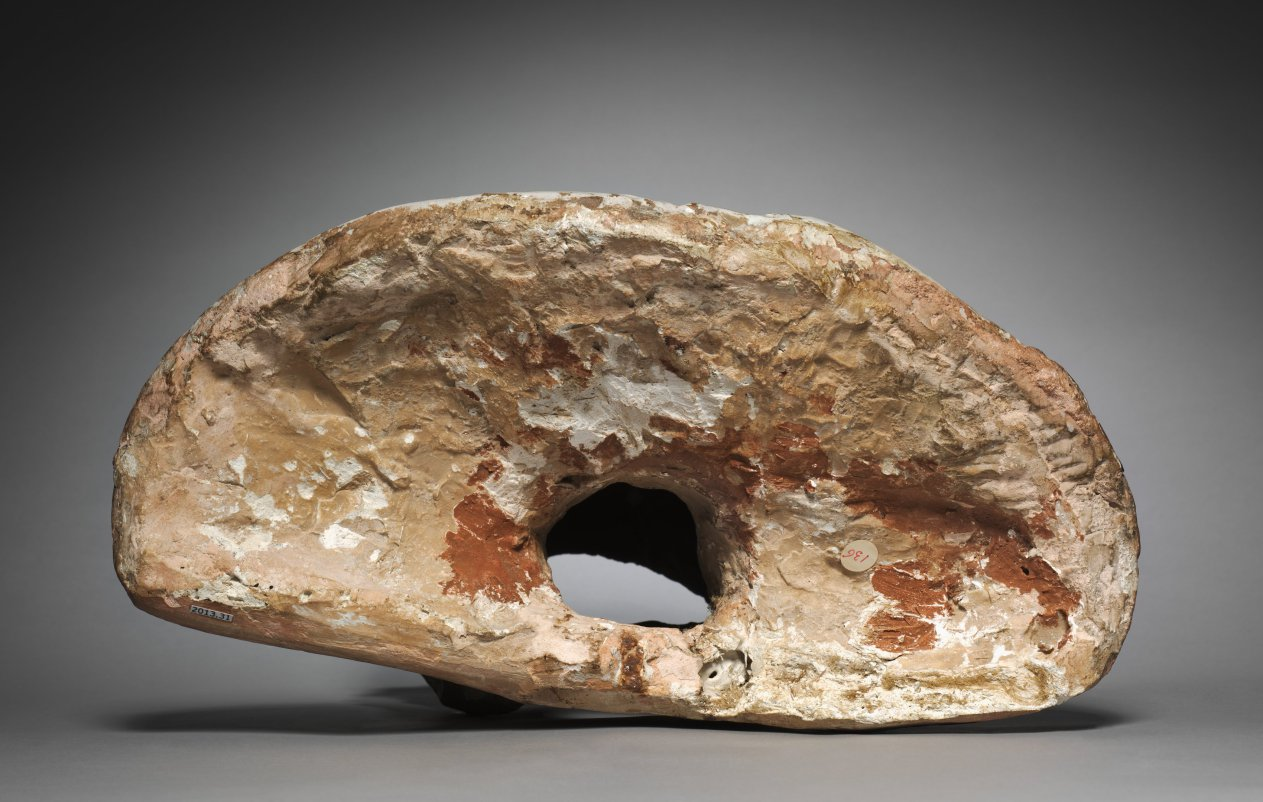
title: Bust of a Classical Hero or Emperor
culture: Italy, 16th century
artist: Girolamo della Robbia (Italian, 1488–1566)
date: early to mid 16th century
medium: glazed terracotta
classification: Sculpture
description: This bust most likely represents an emperor or condottiere from classical antiquity, and probably formed part of a series of classical heads. Such groups of worthies were featured as decorative schemes in the studioli and architectural projects of Renaissance statesmen. Attesting to the sophistication of their learned patrons, these busts also provided the opportunity for artists to explore the contemporary stylistic relevance of classical portraiture—a source of fascination and inspiration for Florentine sculptors of this period.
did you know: Head-and-shoulders portraits, known as busts, were popular from Roman times.